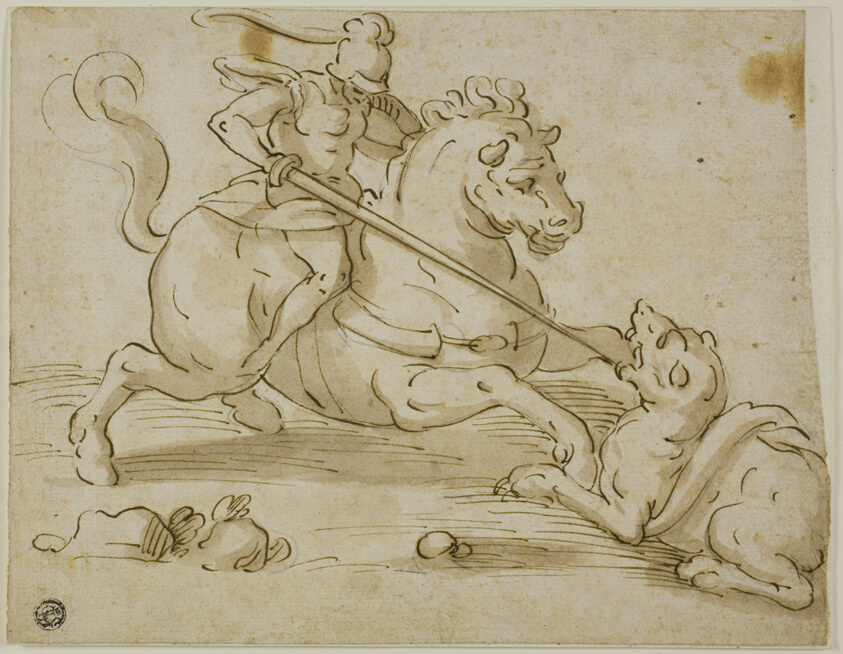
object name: Drawing and Watercolor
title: Saint George and the Dragon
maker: Follower of Luca Cambiaso (Italian, 1527-1585)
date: c. 1570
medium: Pen and brown ink with brush and brown wash, with additions of graphite, on cream laid paper, laid down on ivory laid paper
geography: Italy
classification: ink with wash; drawings (visual works); prints and drawing